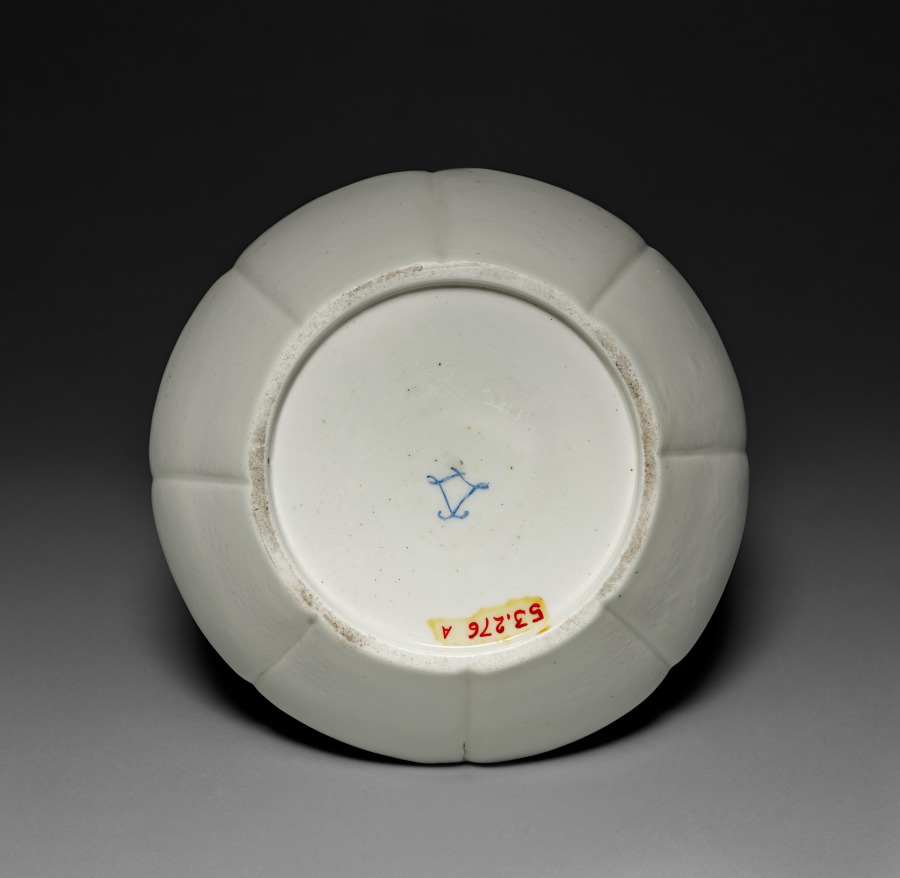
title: Saucer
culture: France, Vencennes, 18th century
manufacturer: Vincennes Porcelain Factory (France, 1740–56)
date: c. 1750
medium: soft-paste porcelain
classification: Ceramic